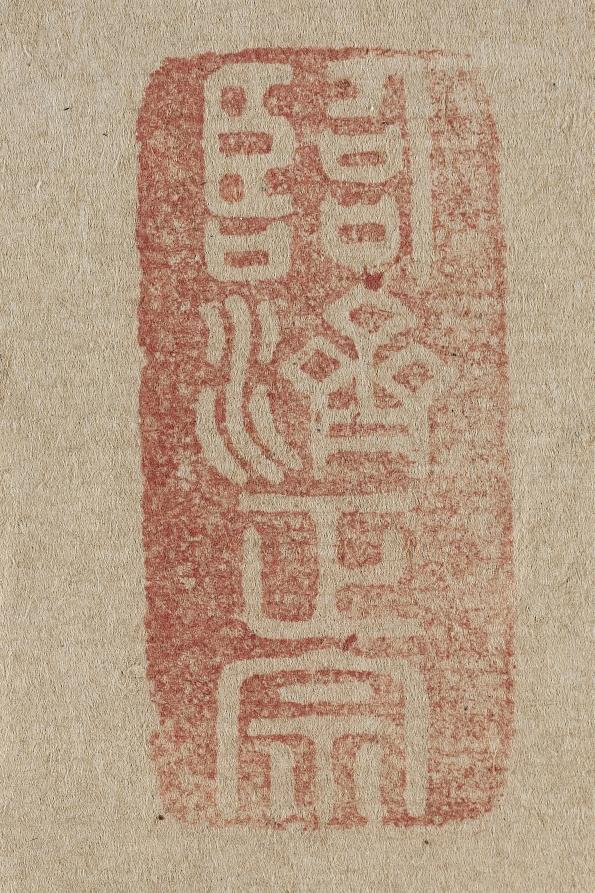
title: Calligraphy in Semi-Cursive Style (xing-caoshu)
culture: China, Qing dynasty (1644–1911)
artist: Yueshan Daozong (Chinese, 1629–1709)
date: c. 1660–1709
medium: Hanging scroll; ink on paper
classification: Calligraphy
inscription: 初/ 龍吟初夜後，虎嘯五更前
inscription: 悅山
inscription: 道宗之印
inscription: Linji zheng zong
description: This spontaneous, bold calligraphy style is characteristic of members of the Japanese Ōbaku school (Huangbo in Chinese) of Chan (Zen in Japanese) Buddhism, which was founded in Japan by Chinese monks in the 1600s. The monk Yueshan emigrated to Japan from the Chinese province of Fujian, taking a priestly post at Manpukuji, the headquarters of the Ōbaku school in Japan. He later became the seventh abbot of the distinguished temple. Yueshan’s calligraphy features rounded characters that allow him to fuse strokes and characters in speedy brush movements. Here the text begins with the large character chu (初, “the beginning”), the initial focus of meditation on the text: The dragon murmurs after sunset. The tiger roars before dawn.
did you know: Ōbaku-style calligraphy favors rounded—rather than angular—brushstrokes. It is not a subtle style of calligraphy, as the Chan monks preferred a bold approach.